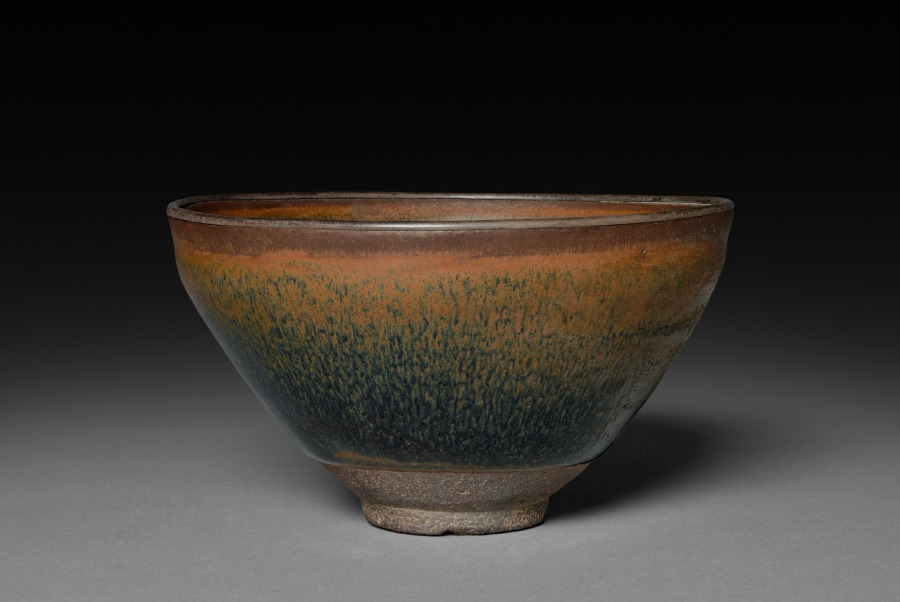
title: Tea Bowl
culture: China, Fujian province, Song dynasty (960-1279)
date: 960–1279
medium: purplish brown stoneware with iron slip glaze coating, Jian ware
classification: Ceramic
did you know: Jian ware was very popular with the tea cultures in China and Japan.